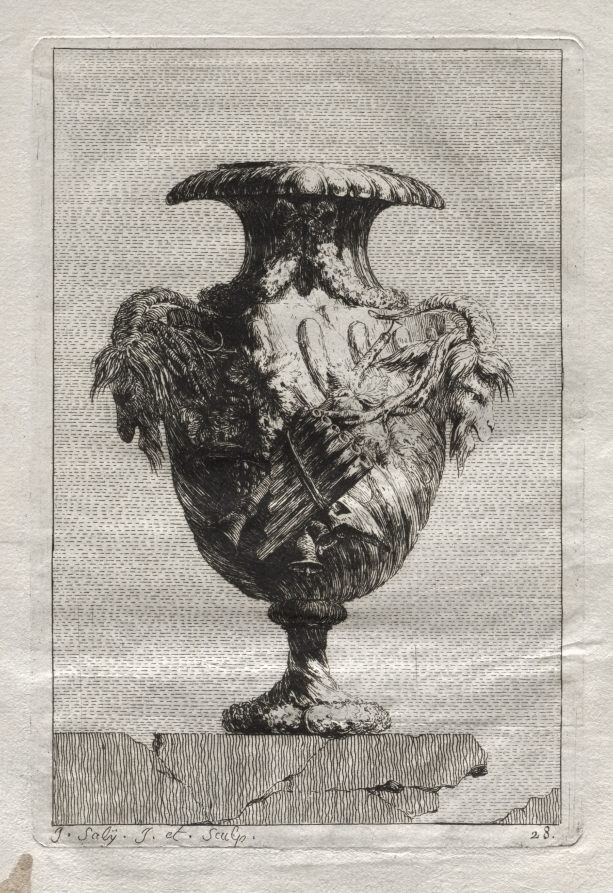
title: Suite of Vases: Plate 28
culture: France, 18th century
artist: Jacques François Saly (French, 1717–1776)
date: 1746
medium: etching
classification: Print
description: Designing ornamental vases or urns was particularly popular during the mid-18th century since the only limit to the possibilities was the imagination of the artist. Saly, a sculptor by training, was a student at the French Academy in Rome from 1740 to 1746, at which time he published a set of 30 etchings. Saly began with basic antique vase forms but deviated from classical ornament to use a rich variety of fantastic creatures for embellishment.